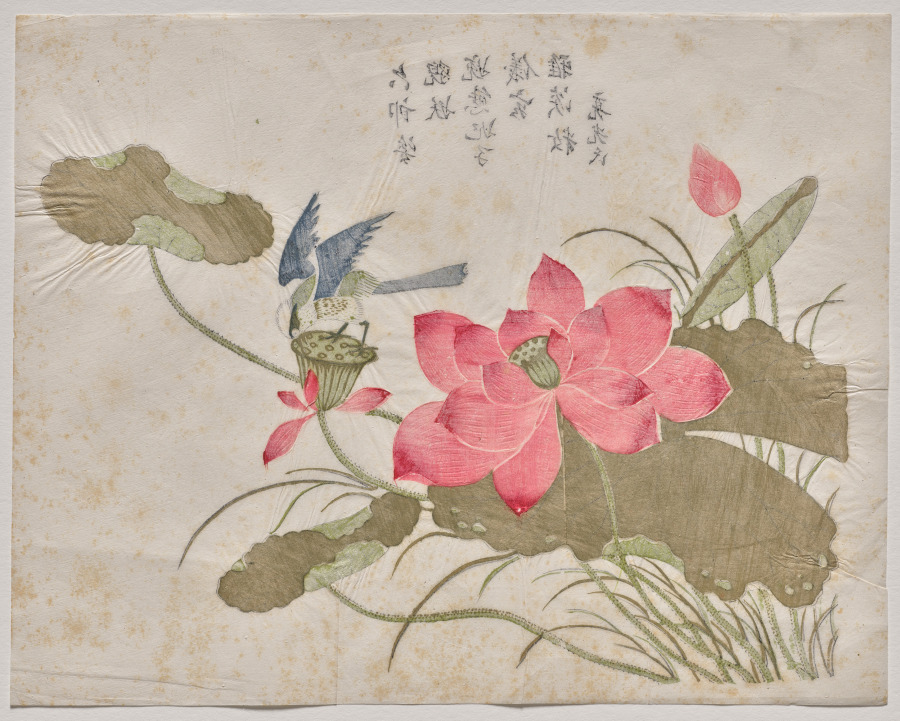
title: Bird on Lotus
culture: China, Suzhou, Qing dynasty (1644–1911)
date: 1700–1750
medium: Polychrome woodblock print; ink and color on paper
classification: Print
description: In the 1600s, printing flourished in such Jiangnan cities as Nanjing, Suzhou, Hangzhou, and Huizhou, evolving from privately enjoyed illustrated books printed in color to more commercialized single-sheet color prints that were hung on walls and became part of the rich urban visual culture.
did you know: Woodblock printing in color reached a height in China in the 1600s to 1700s. The prints were executed by means of sets of separate blocks, each carved to print a different color.